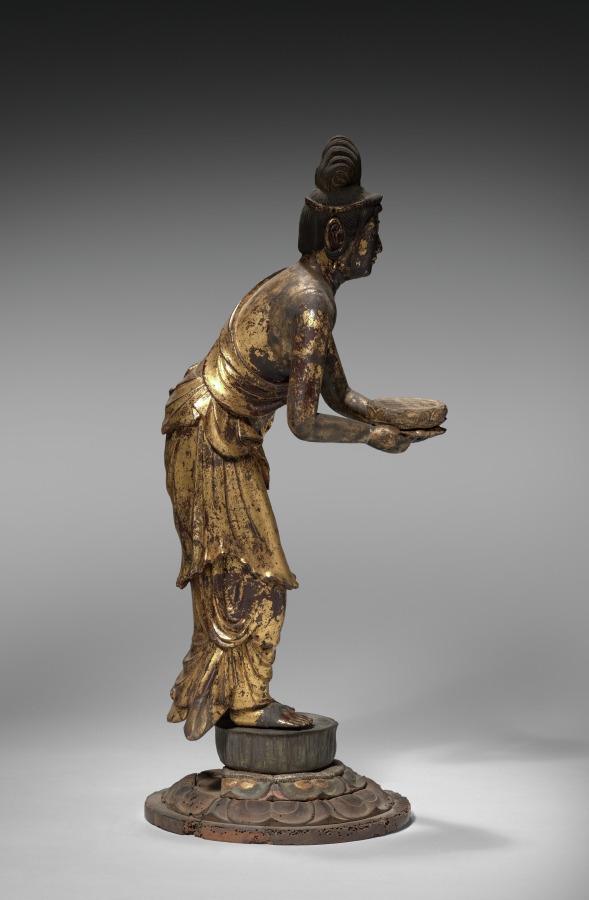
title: Kannon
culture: Japan, Kamakura period (1185–1333)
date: early 1200s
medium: wood with lacquer and gold leaf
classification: Sculpture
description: Kannon, the bodhisattva of compassion, is one of the two bodhisattvas attending Amida, the Buddha of the Western Paradise. The sculpture stands on a lotus pedestal, holding a lotus dais on which the soul of the faithful is received into paradise. The use of gold was prevalent in Buddhist art during this time—it was believed that the yellow light permeated the regions of the Amida—and Amida worship prevailed throughout Japan.